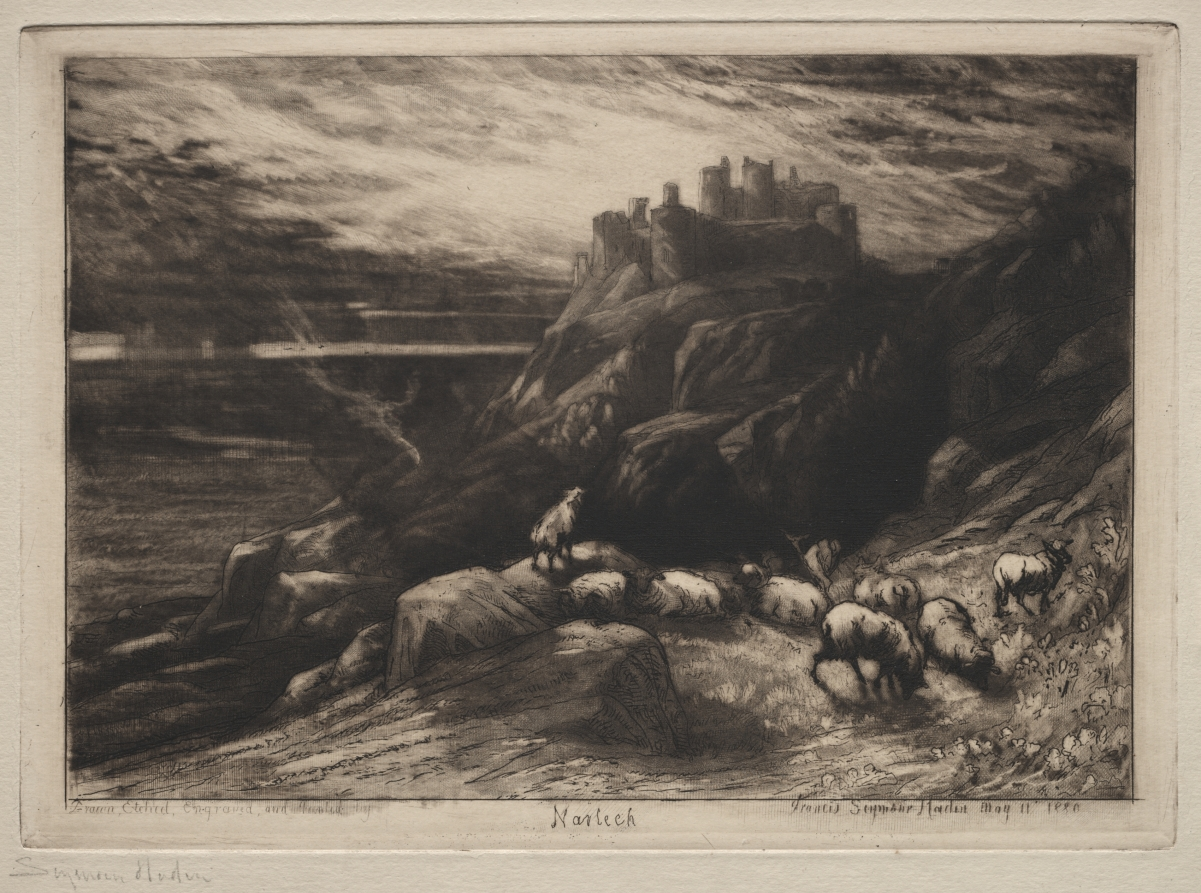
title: Harlech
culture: England, 19th century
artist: Francis Seymour Haden (British, 1818–1910)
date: 1880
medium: mezzotint, etching and drypoint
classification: Print